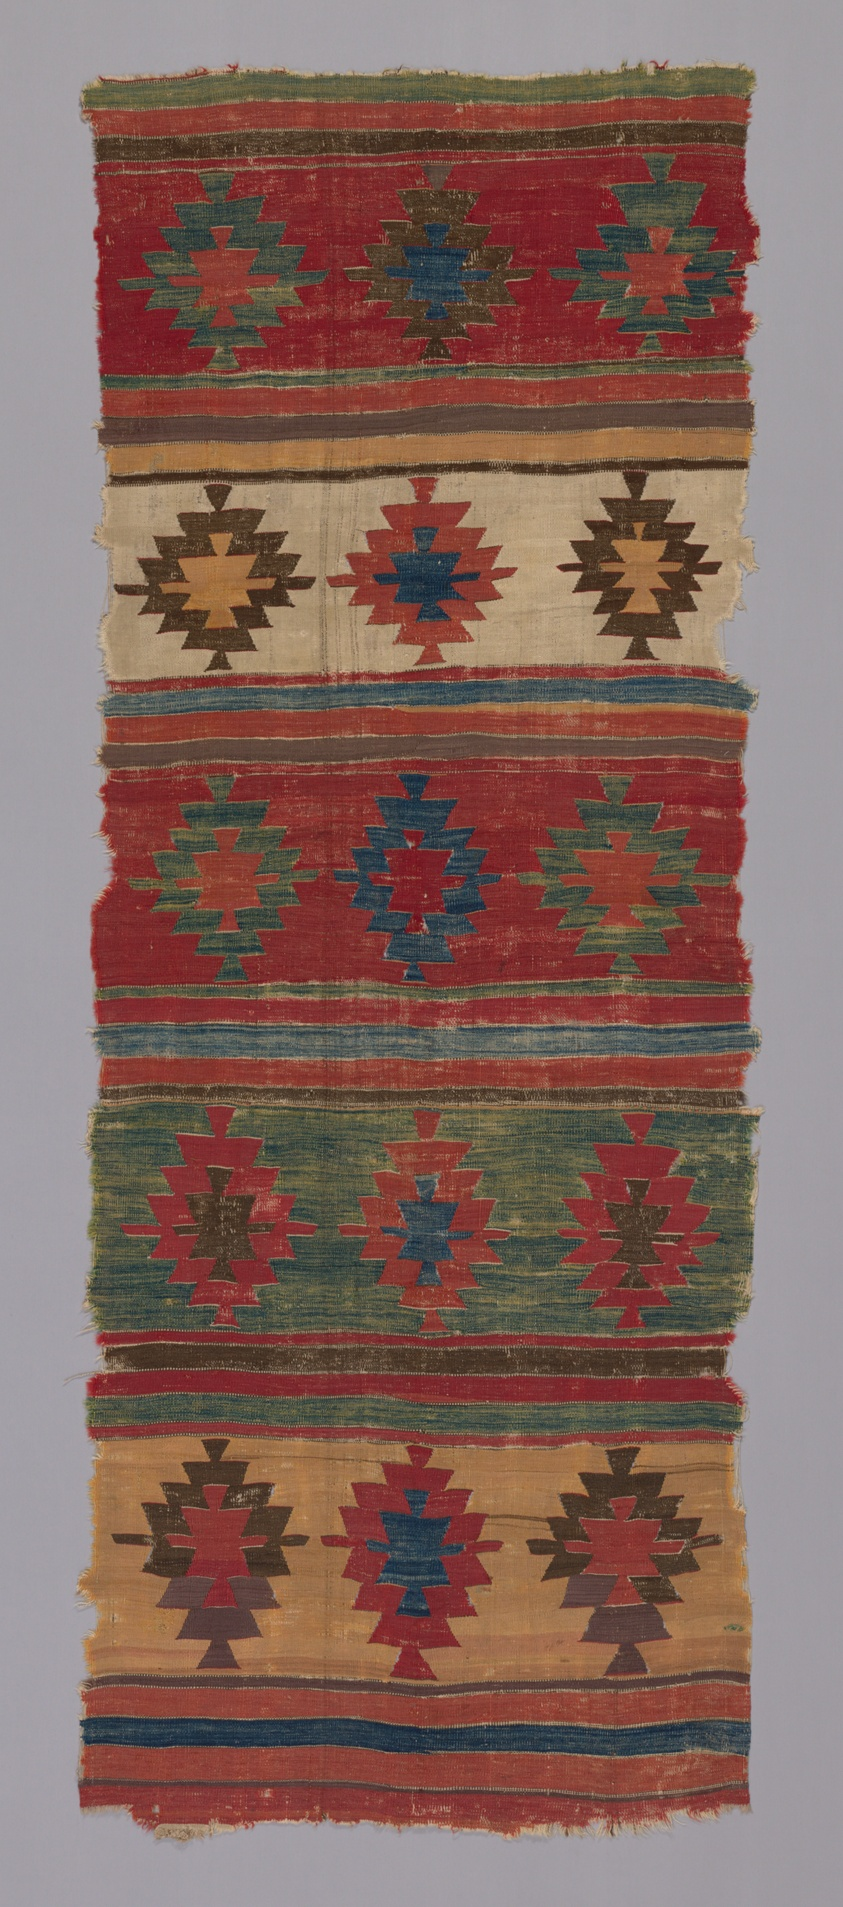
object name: Textile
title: Kilim with Bands of "Star" Motifs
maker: Turkey, central Anatolia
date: 1st quarter of the 18th century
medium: Wool, slit-tapestry weave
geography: Turkey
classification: weaving - carpet; textile